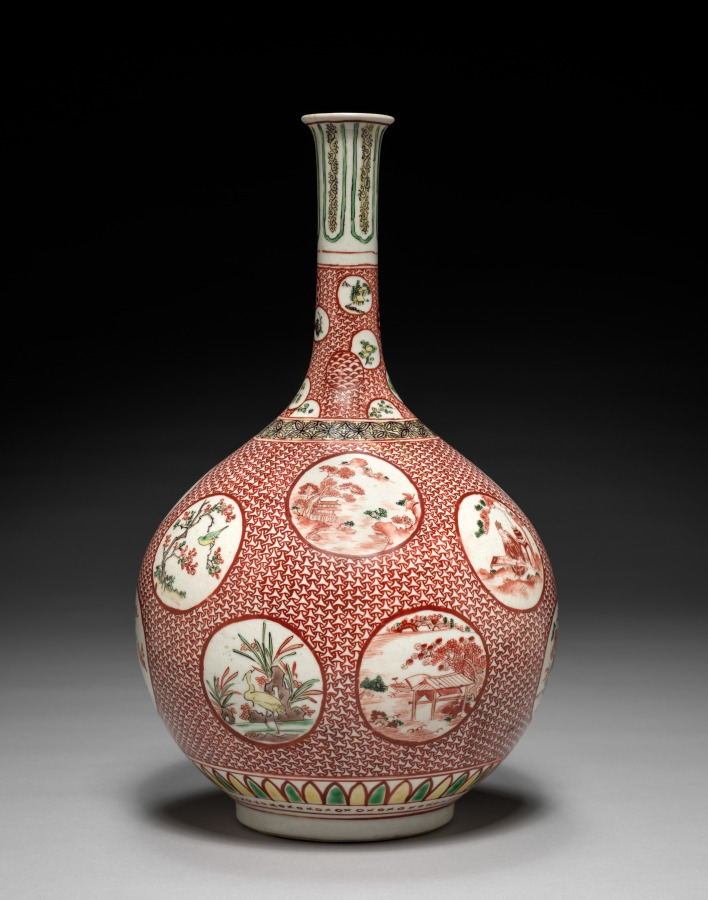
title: Vase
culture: Japan, Edo period (1615–1868)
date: late 1600s-early 1700s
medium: porcelain with decoration in colored enamels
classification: Ceramic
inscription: character "Fuku" (well-being) on base in black with green overglaze.